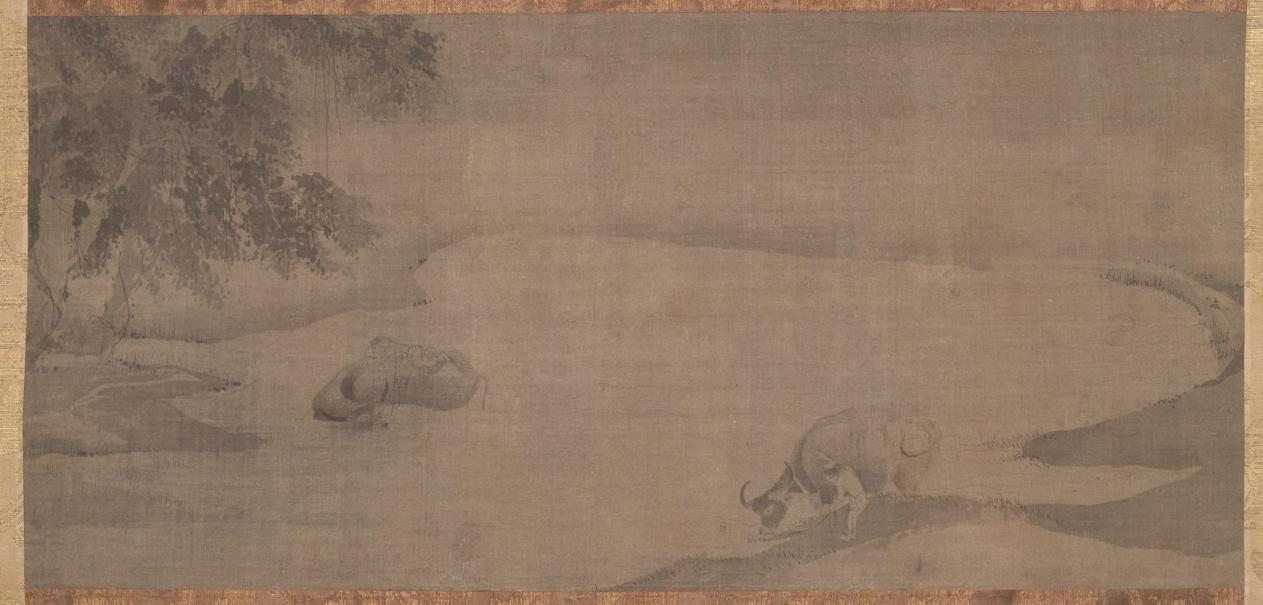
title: Water Buffalo and Herdboys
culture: China, Yuan dynasty (1271-1368)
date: late 1200s–early 1300s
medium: Hanging scroll; ink on silk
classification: Painting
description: In southern China, farmers use water buffalos to help plow their fields, which children often tend. In Buddhist teachings, the subject of herding or taming an ox was used to illustrate the 10 steps to enlightenment, or spiritual awakening. A single image may be read as a metaphorical representation of the Chan process of attaining enlightenment, the difficulty of which was likened to that of finding a strayed buffalo. Here, a buffalo is watered by a boy, another takes a bath in the pond. Chan paintings introduced to Japan were often remounted to fit them into niches for display (tokonoma), which explains the painting’s current format.